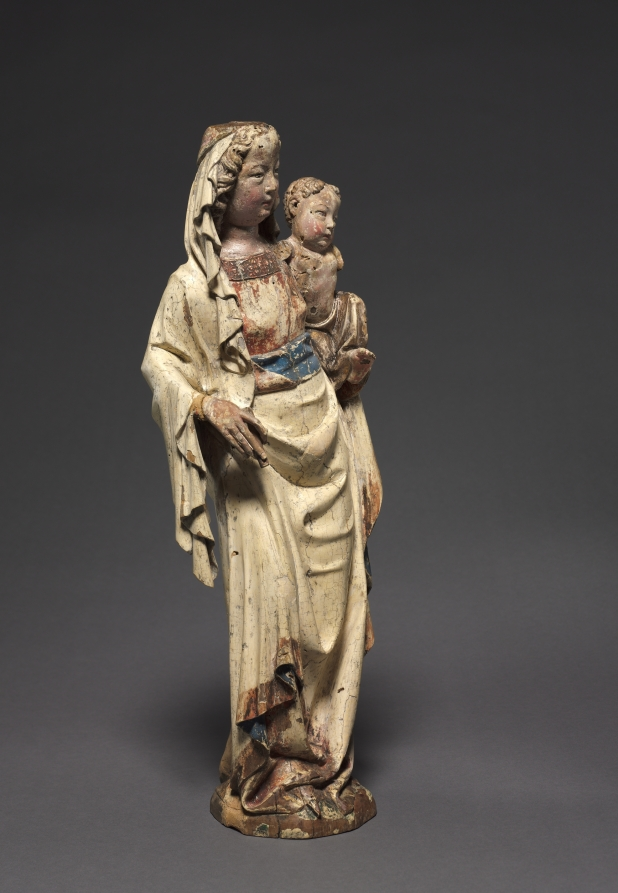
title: Virgin and Child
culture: Austria, Diocese of Passau, 14th century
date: c. 1370–1380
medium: painted lindenwood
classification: Sculpture